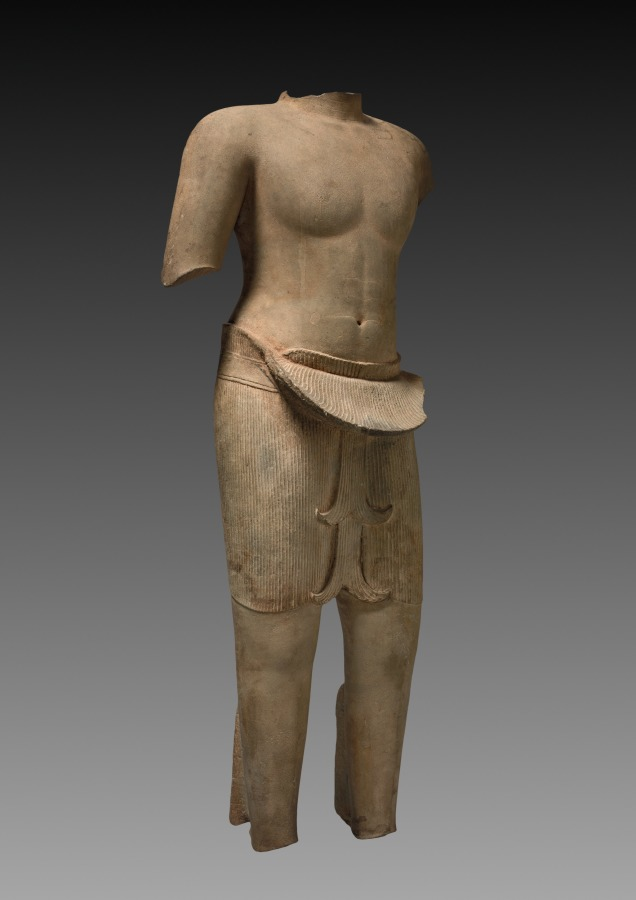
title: Male Deity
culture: Cambodia, Koh Ker-Khleong style, 10th century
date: 925–50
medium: sandstone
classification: Sculpture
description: The distinctive swath of pleated cloth and the anchor-shaped ends of the lower garment suggest that this sculpture was made when this method of wrapping the sampot was fashionable. During that time, Cambodian temples were dedicated to Hindu deities, whose images were dramatically installed alone on a pedestal in a temple's sanctum. When consecrated, gold tokens were installed under the pedestal; many sculptures were broken when people toppled them to get the gold.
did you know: This male deity seems to be striding with his left leg advanced subtly forward.